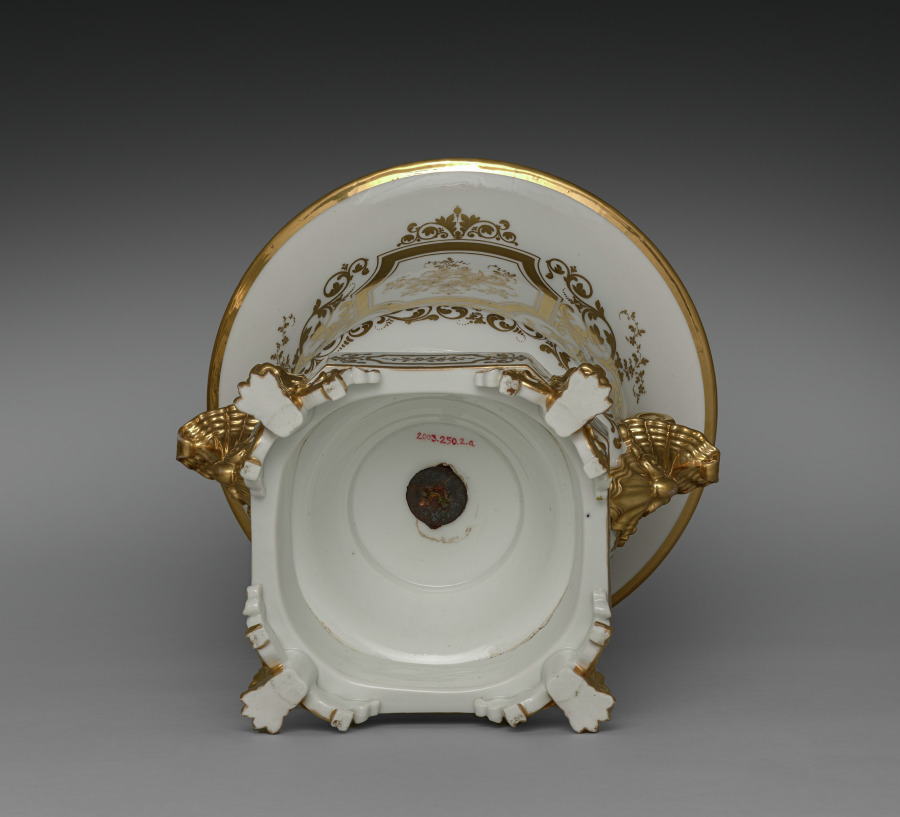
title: Ice Cream Pail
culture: France, Paris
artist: Factory of Jacob-Petit (French, 1830–1865)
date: c. 1840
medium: gilt porcelain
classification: Ceramic